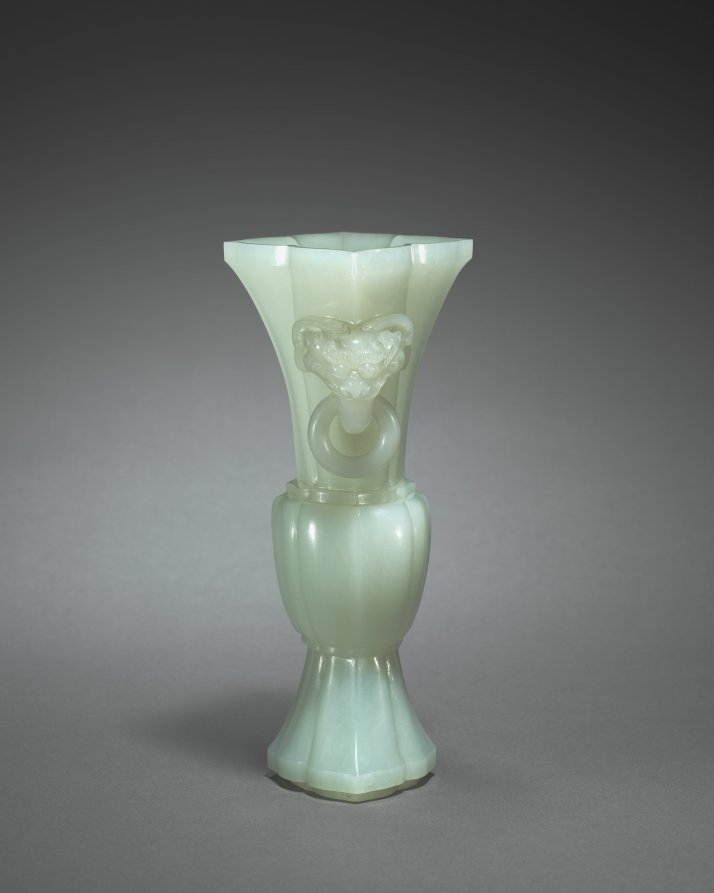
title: Vase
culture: China, Qing dynasty (1644-1911)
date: 1700s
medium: jade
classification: Jade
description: In the Ming (1368–1644) and Qing (1644–1911) dynasties, luxury items became more affordable to larger parts of the society, including women, merchants, and literati in non-official positions. Imperial patronage and a growing urban population encouraged consumption of luxury goods and local craftmanship. This jade vase has free ring handles suspended from a pair of feline masks. The cross-section of vase is an eight-sided lozenge with curving sides. It illustrates the superb carving skills and the creative mind of its accomplished creator, who sought clients on a competitive market.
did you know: This jade vase's flaring lip, central band, and flaring foot are derived from archaic bronze zun.